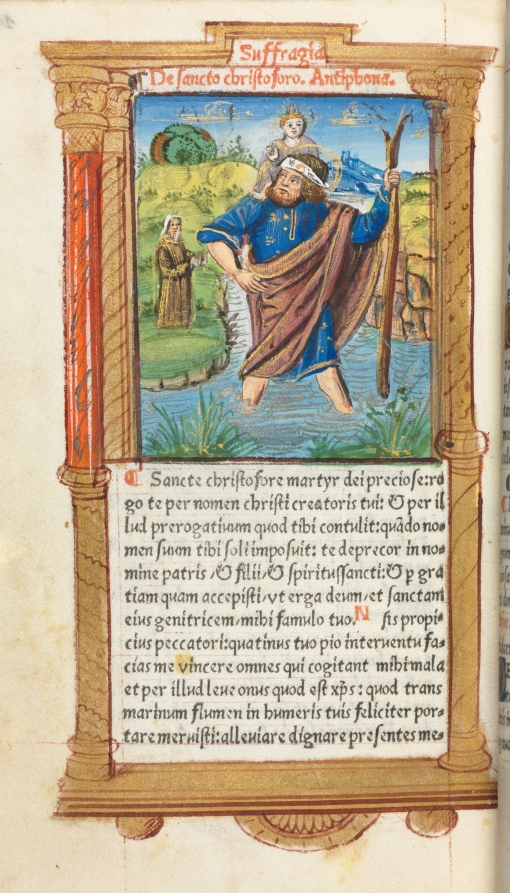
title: Printed Book of Hours (Use of Rome): fol. 101v, St. Christopher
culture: France, Paris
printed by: Guillaume Le Rouge (French, Paris, active 1493–1517)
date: 1510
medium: 112 Printed folios on parchment, bound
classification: Bound Volume